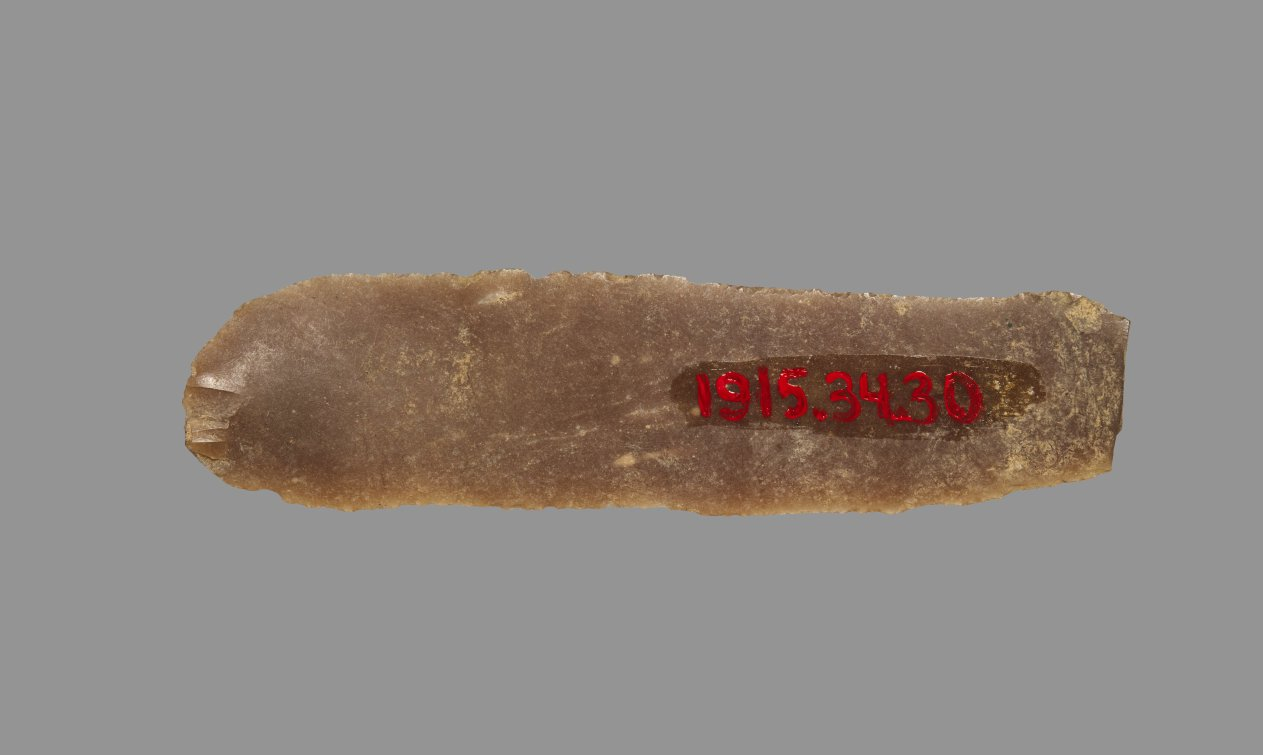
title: Sickle Blade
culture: Egypt, Middle Kingdom (2040–1648 BCE), Dynasty 12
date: 1980–1801 BCE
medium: flint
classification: Implements